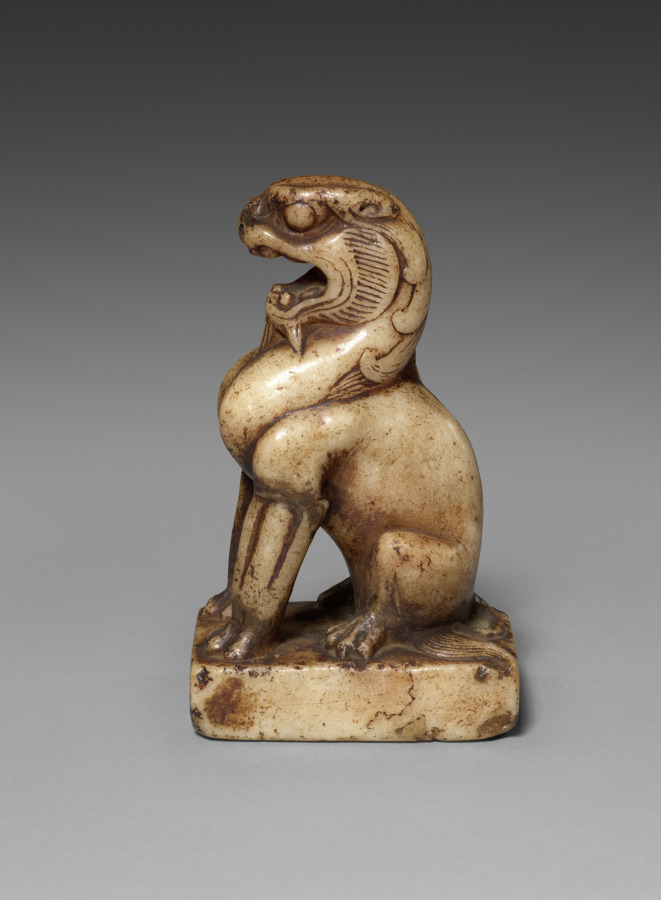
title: Lion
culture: China, Tang dynasty (618-907)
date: 618–907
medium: marble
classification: Sculpture